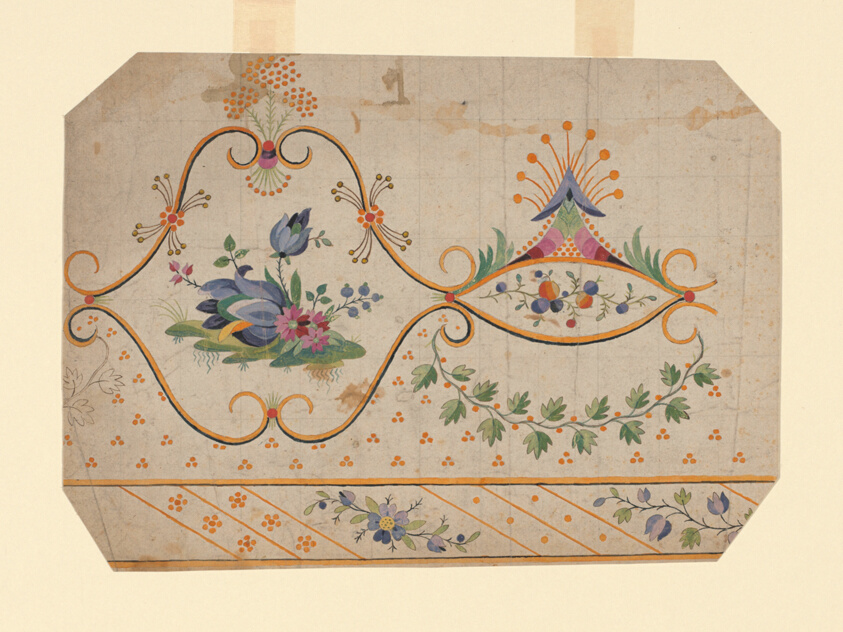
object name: Textile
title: Design for a Woven, Printed or Embroidered Border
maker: France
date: 18th/19th century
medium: Design on paper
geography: France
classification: textile; accessory - paper design; accessories (object genre)